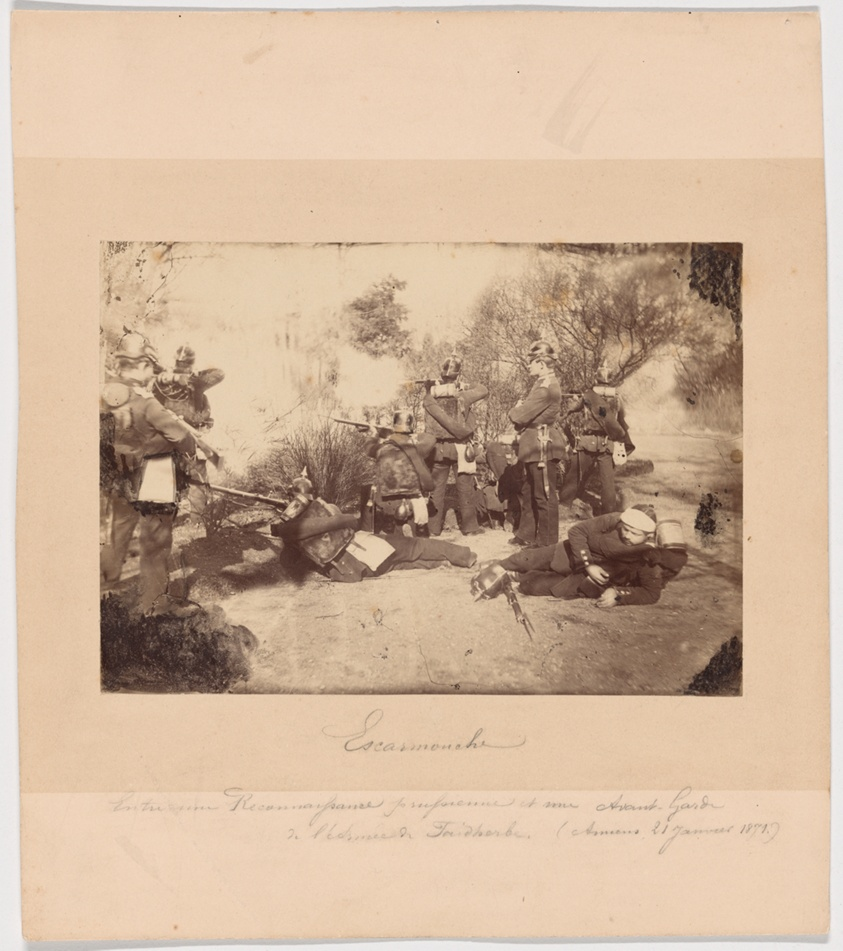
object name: Photograph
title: Skirmish between a Prussian Reconnaissance unit and Advance Troops from Faidherbe’s Army (Amiens, 21 January 1871) (Escarmouche entre une Reconnaissance prussienne et une Avant-Garde de l'Armee de Faidherbe [Amiens, 21 Janvier 1871])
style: 19th century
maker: Artist unknown; European, active 19th century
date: January 21, 1871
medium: Albumen print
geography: Europe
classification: photography; albumen silver print; photographic process; photograph